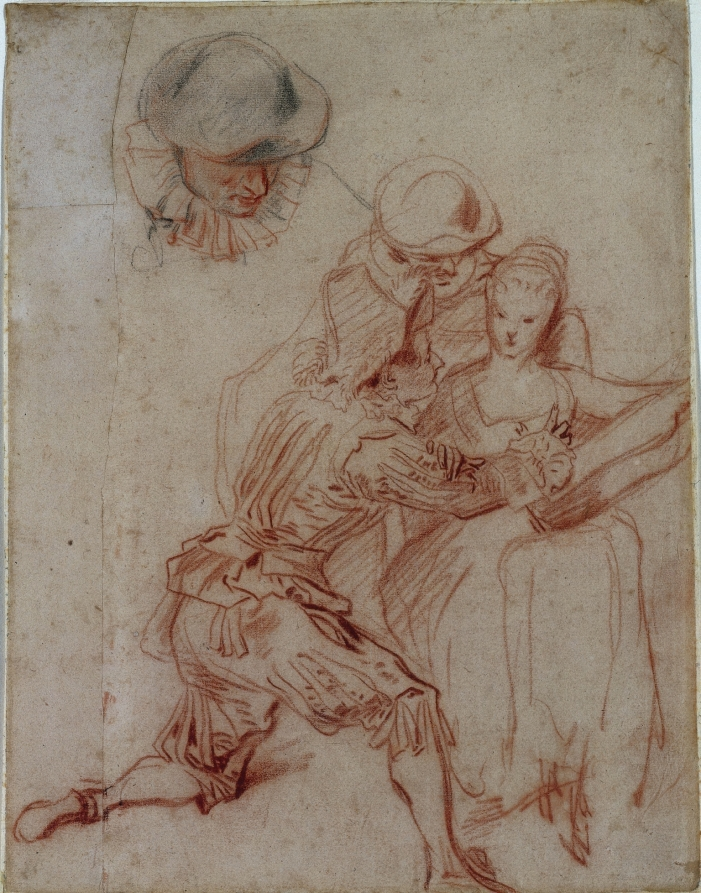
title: Study for "The Romancer" (Le Conteur)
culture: France, 18th century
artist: Jean-Antoine Watteau (French, 1684–1721)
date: c. 1716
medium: red chalk; red and black chalk (upper left figure)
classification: Drawing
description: This sheet was a preparatory study for the painting The Romancer. An actor in the costume of Mezzetin, a stock character of the commedia dell’arte (a type of satirical theatrical entertainment of Italian origin popular in aristocratic circles in 18th-century France), interrupts a guitarist with a bold sexual advance. Another actor dressed as the French pantomime stock character Pierrot peers lasciviously over the young musician’s shoulder. A more detailed study of Pierrot’s head occupies the upper left corner of the sheet, demonstrating Jean Antoine Watteau’s experimentation with how to most effectively depict a lecherous gaze.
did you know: Jean Antoine Watteau likely drew this sheet from a combination of life study and imagination, working from a model and adding other elements of his own creation.